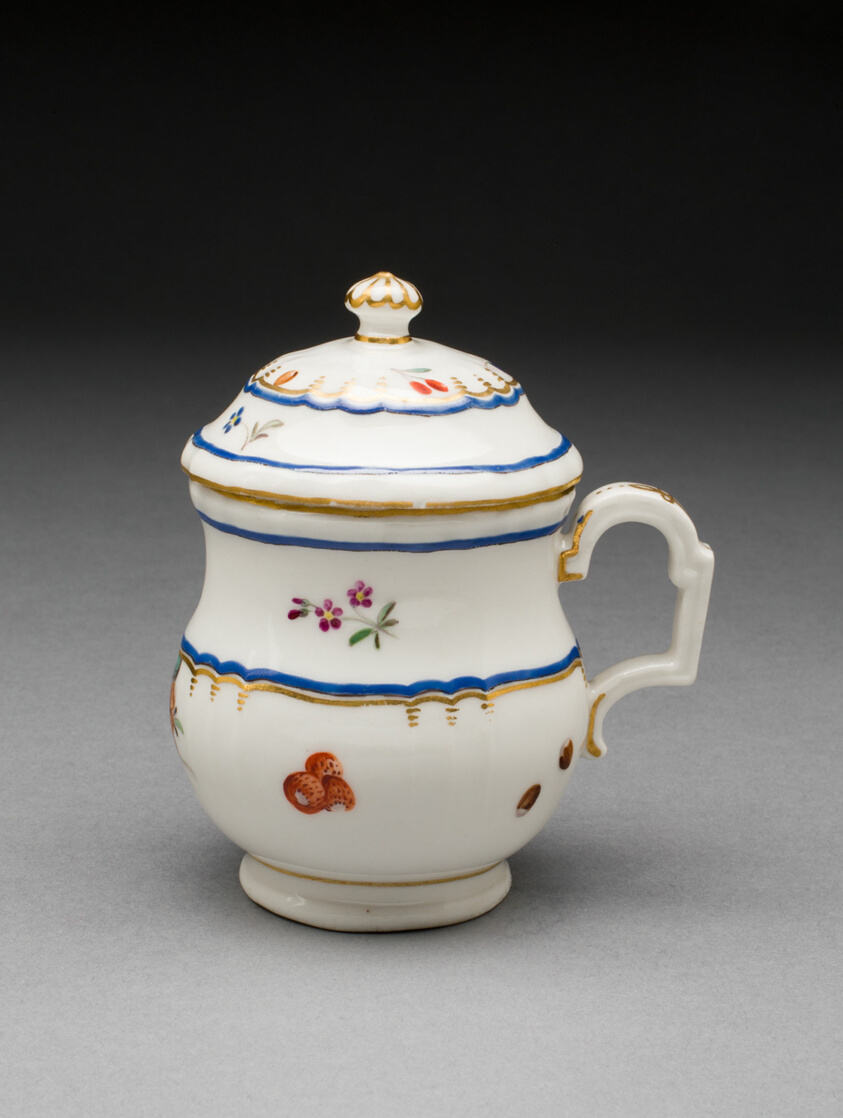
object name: Ceramics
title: Cream Pot with Lid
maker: Frankenthal Porcelain Factory; German, founded 1755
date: 1786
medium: Hard-paste porcelain with polychrome enamel and gilding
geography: Frankenthal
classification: tableware; ceramics; porcelain; european decorative arts